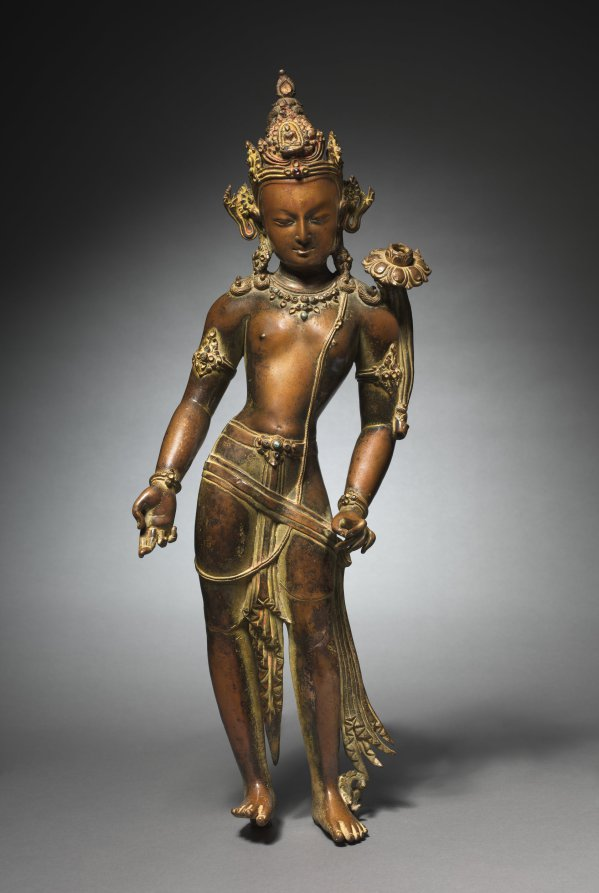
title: Avalokitesvara Padmapani: Bodhisattva of Mercy Bearing a Lotus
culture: Nepal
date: c. 1000s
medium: bronze with gilding, pigment, and semiprecious stones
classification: Sculpture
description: Venerated by Buddhists across the world as the perfect embodiment of compassion for all beings, this bodhisattva-a being only one stage away from complete enlightenment-holds his right hand out gently in the gesture of gift-giving. In his left hand, he once grasped the stem of a lotus flower that blossoms over his left shoulder, indicative of the abundant benefits that result from acts of loving kindness. All bodhisattvas wear royal garments and jewels, in reference to the historical Buddha’s early life as a prince, prior to his achievement of enlightenment through meditations in the forest. In the center of his crown is the tiny seated image of the meditating Buddha Amitabha that identifies this figure as Avalokitesvara specifically. Nepalese bronzes of the 11th century are solid cast and have an exceptionally high copper content in the alloy that makes the bronze difficult to manage during fabrication. The color achieved by the extra copper creates a distinctive warmth and softness in the sculpture. The flexed toes of the right foot and the swinging to one side of the gathered ends of his garment impart a sense of dynamism to his ongoing act of giving. His facial expression is sweet and placid but sharp, as though he is keenly aware of the sufferings of the world.